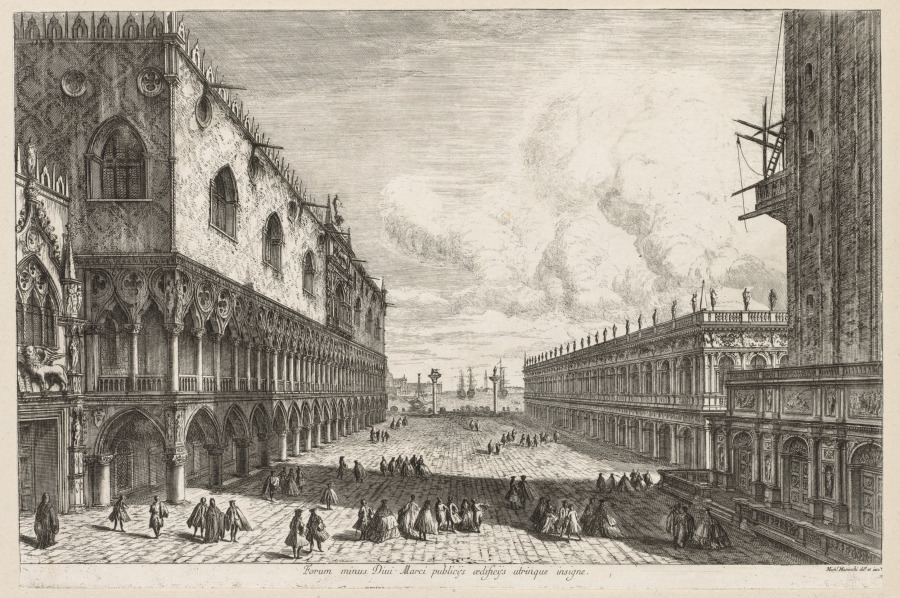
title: Views of Venice: The Piazzetta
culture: Italy, 18th century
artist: Michele Marieschi (Italian, 1710–1743)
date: 1741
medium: etching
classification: Print